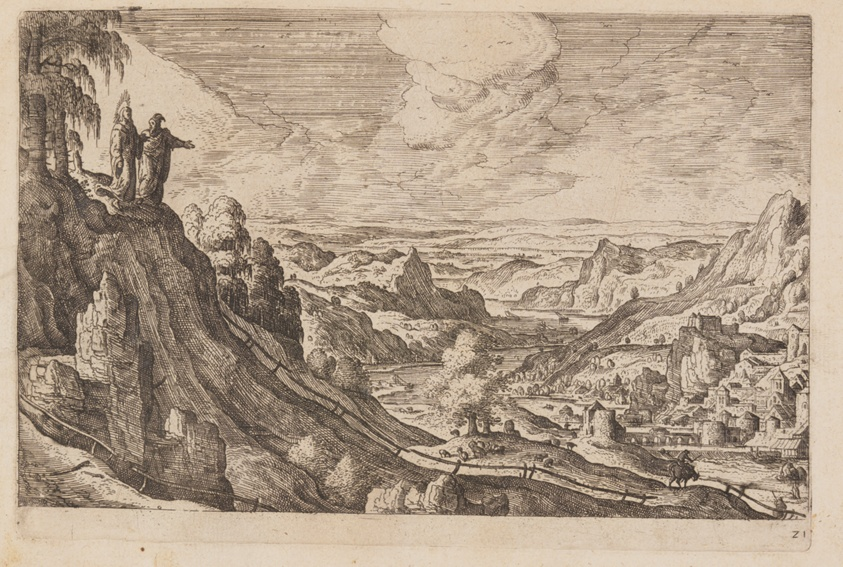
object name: Print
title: Plate 21, from Landscapes with Scenes from the Old and New Testament and Ovid’s Metamorphoses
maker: Hans Bol (Flemish, 1534–1593); published by Philip Galle (Flemish, 1537–1612)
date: 1574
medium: Etching on ivory laid paper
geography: Flanders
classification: print; paper; prints and drawing; etching